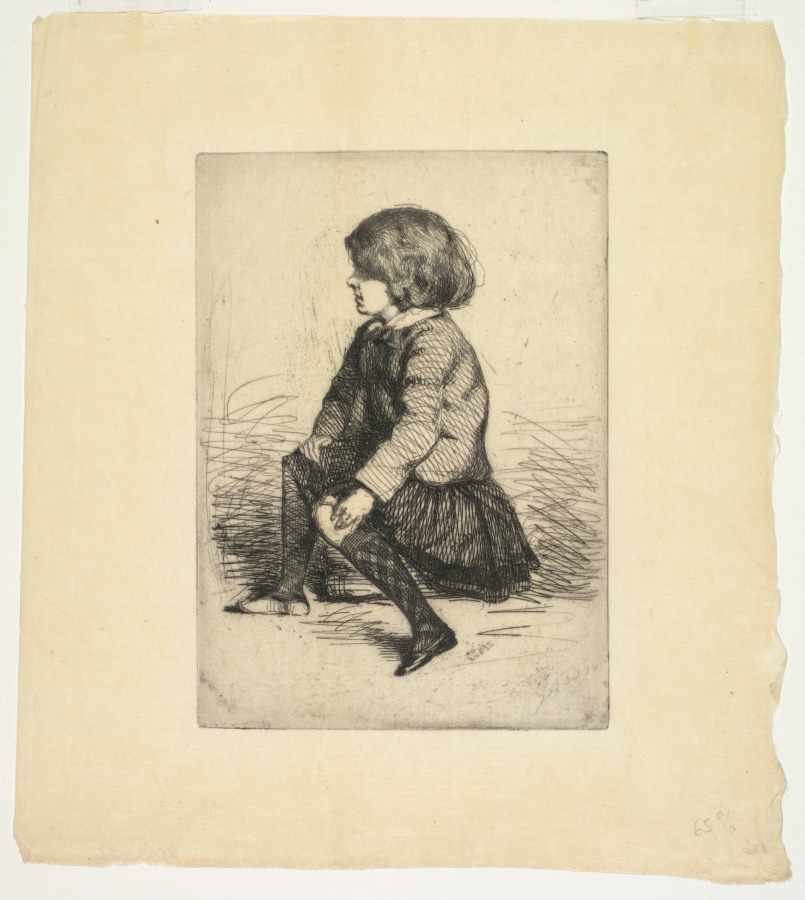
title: Seymour Haden Jr., Seated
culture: America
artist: James McNeill Whistler (American, 1834–1903)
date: 1857–58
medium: etching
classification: Print